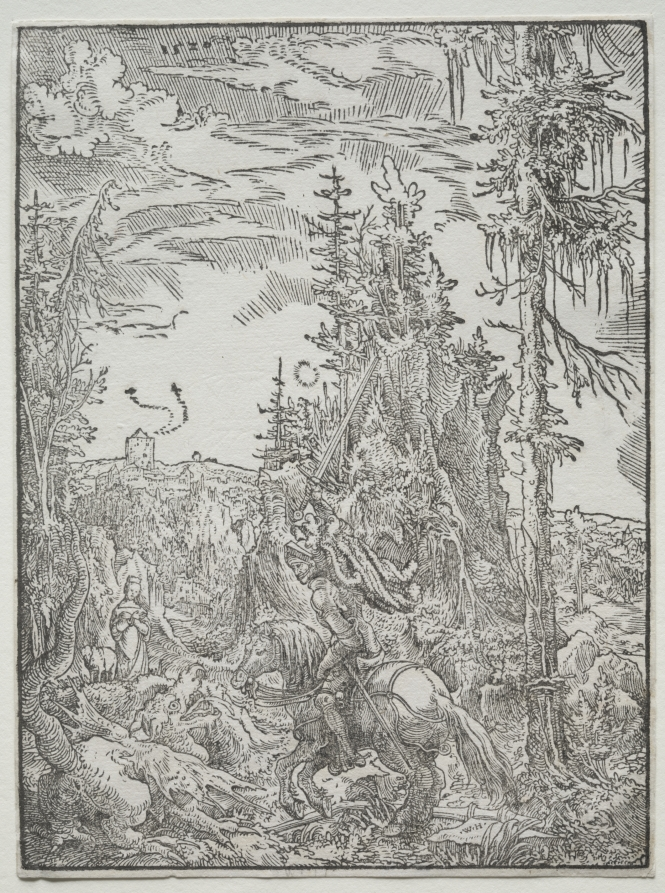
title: St. George and the Dragon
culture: Austria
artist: Wolfgang Huber (Austrian, 1490–1553)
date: 1520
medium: woodcut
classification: Print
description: Landscape draftsman Wolfgang Huber made only a few prints. In this woodcut, he developed ideas from his drawings, such as the radiating light, agitated clouds, and soaring trees. Here, he applied these ideas to the story of Saint George slaying the dragon. Huber rendered the figures with the same short marks as the trees and rocks surrounding them so that they appear to blend into the landscape.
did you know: Despite written legends placing Saint George’s slaying of the dragon in North Africa, this scene takes place in a Northern European forest.